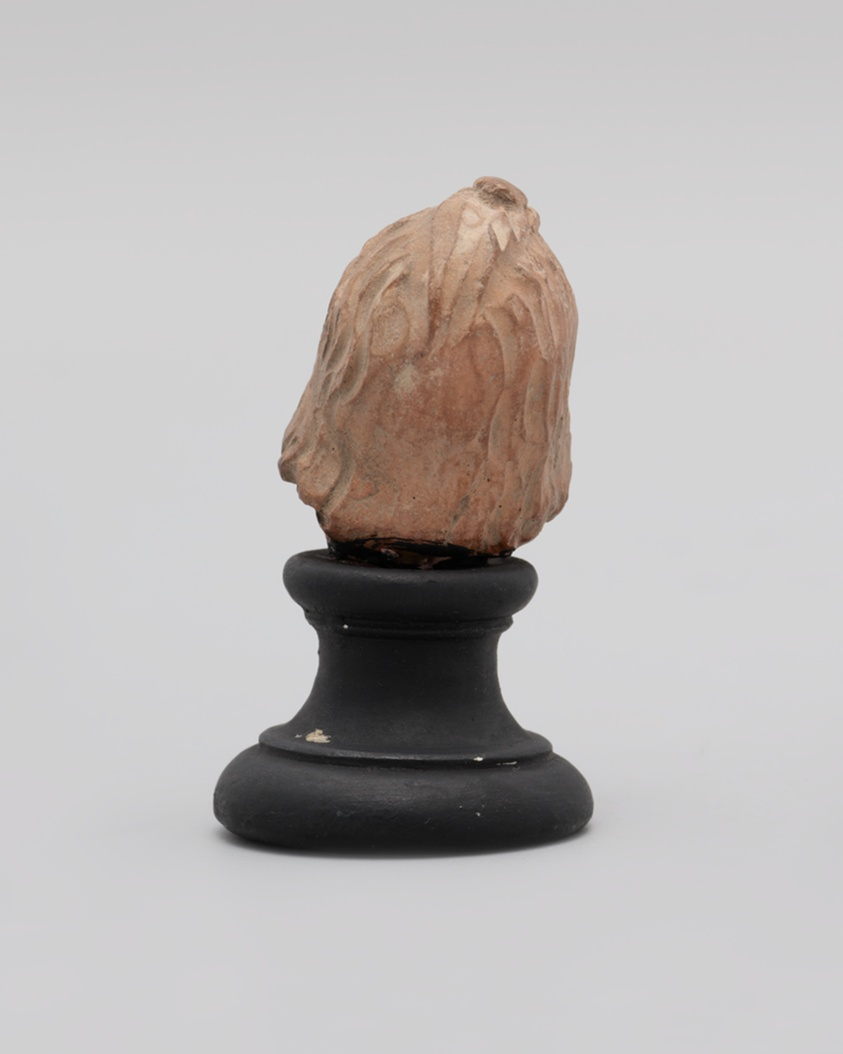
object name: Sculpture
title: Head of a Child or Woman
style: greek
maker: Greek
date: 2nd-1st century BCE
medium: terracotta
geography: Greece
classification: earthenware; ceramics; sculpture; ancient art